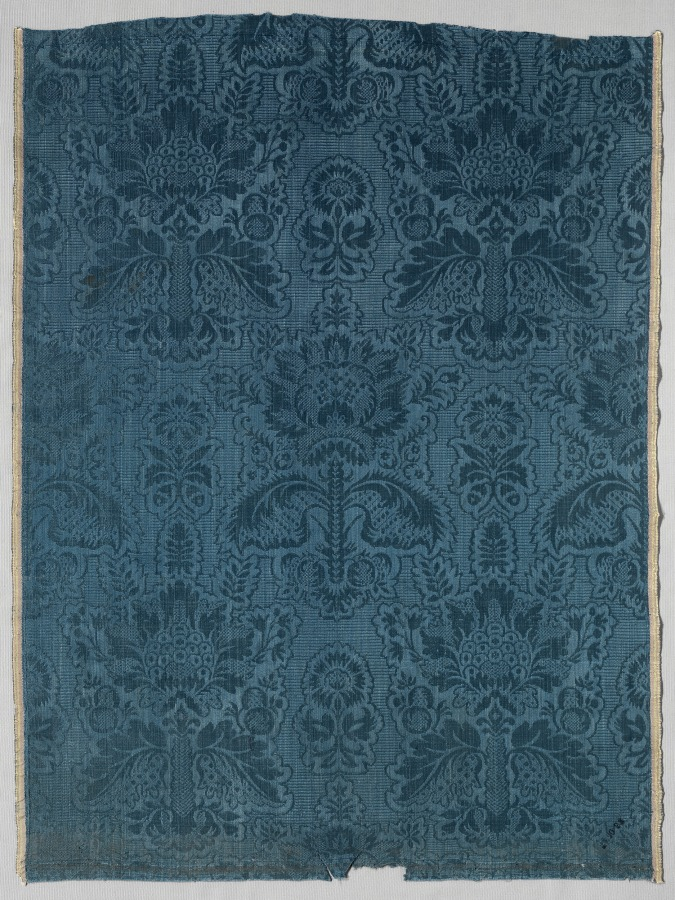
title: Fragment of Figured Silk for Upholstery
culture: France, first half of 18th century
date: 1700–1750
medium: damask and cannelé, silk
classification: Textile